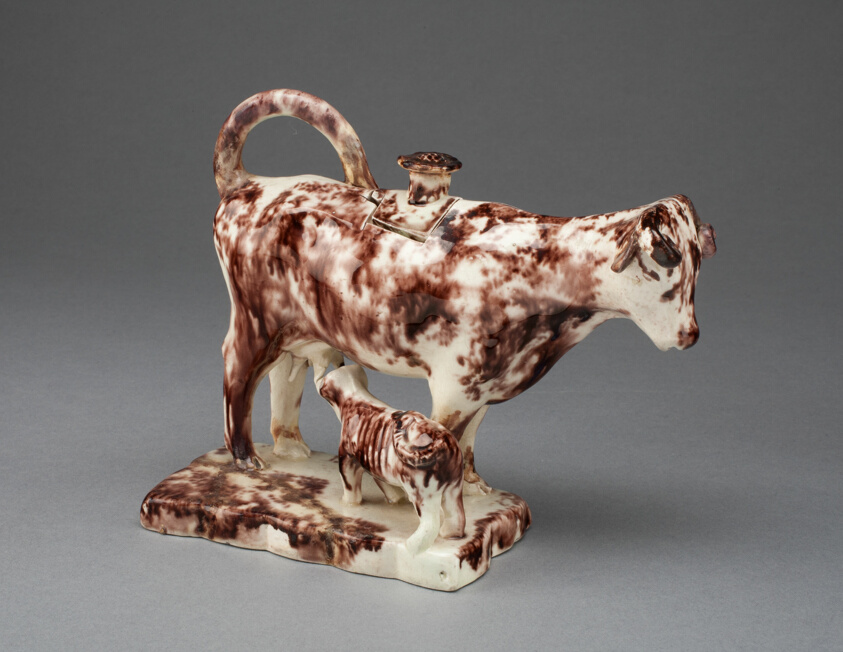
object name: Ceramics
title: Cow Creamer with Calf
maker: Staffordshire, England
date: 1770/95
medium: Lead-glazed earthenware (creamware)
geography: Staffordshire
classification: earthenware; lead-glazed earthenware; creamware; european decorative arts; ceramics